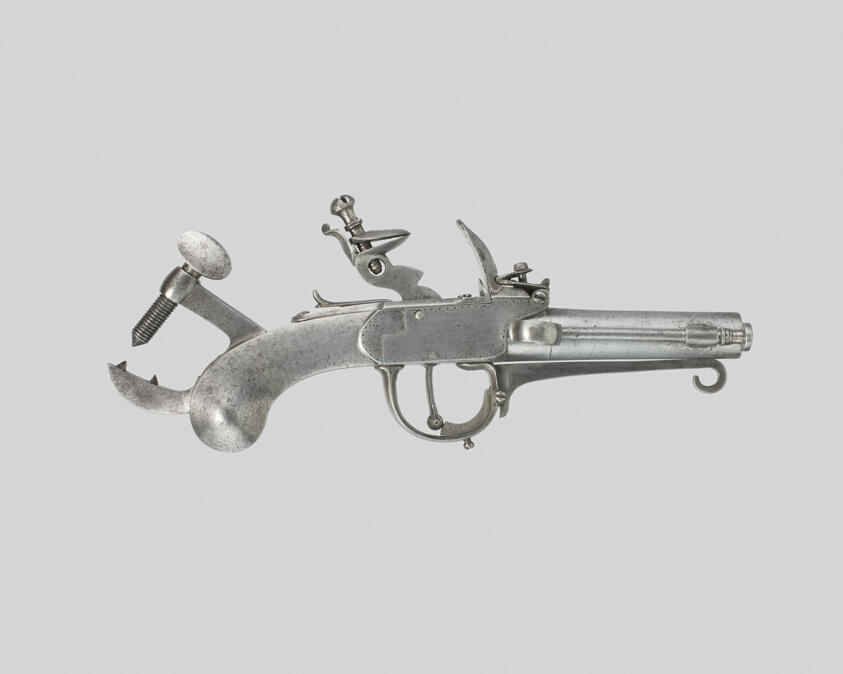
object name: Arms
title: Flintlock Alarm-Trap Pistol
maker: French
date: c. 1800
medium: Steel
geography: France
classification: firearm-handgun; arms; arms and armor